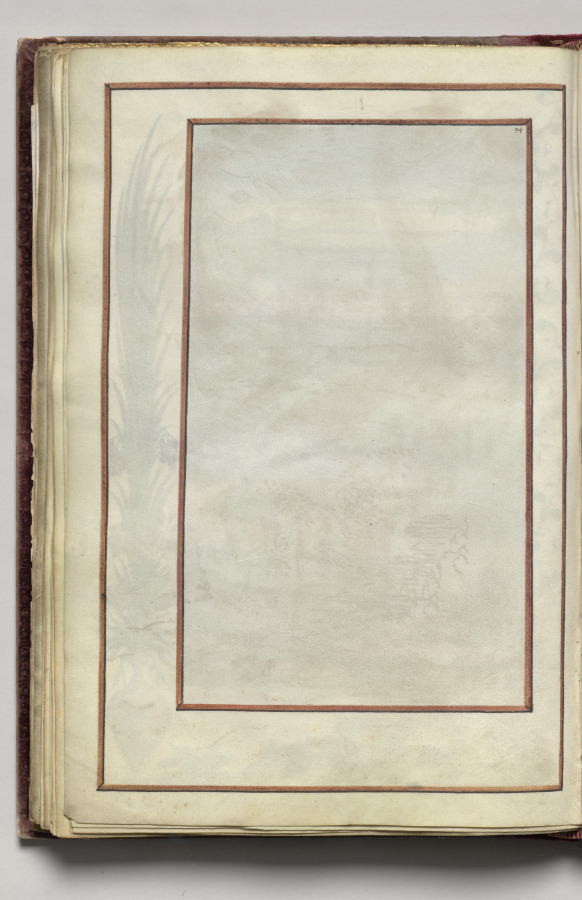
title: Border, folio 41 (verso), from Florilegium (A Book of Flower Studies)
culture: France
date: 1608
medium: watercolor, ink, silver and gold over occasional traces of pencil, on vellum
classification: Bound Volume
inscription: Dated: Poitiers 1608 (on frontispiece) Signed: On frontispiece in black ink, lower right: Van Kuyk Notation on drawing: Frontispiece: in pencil, lower margin: * élève de Van Kessel, peintre flammand (* in pencil also appears in front of Van Kuyk's name).